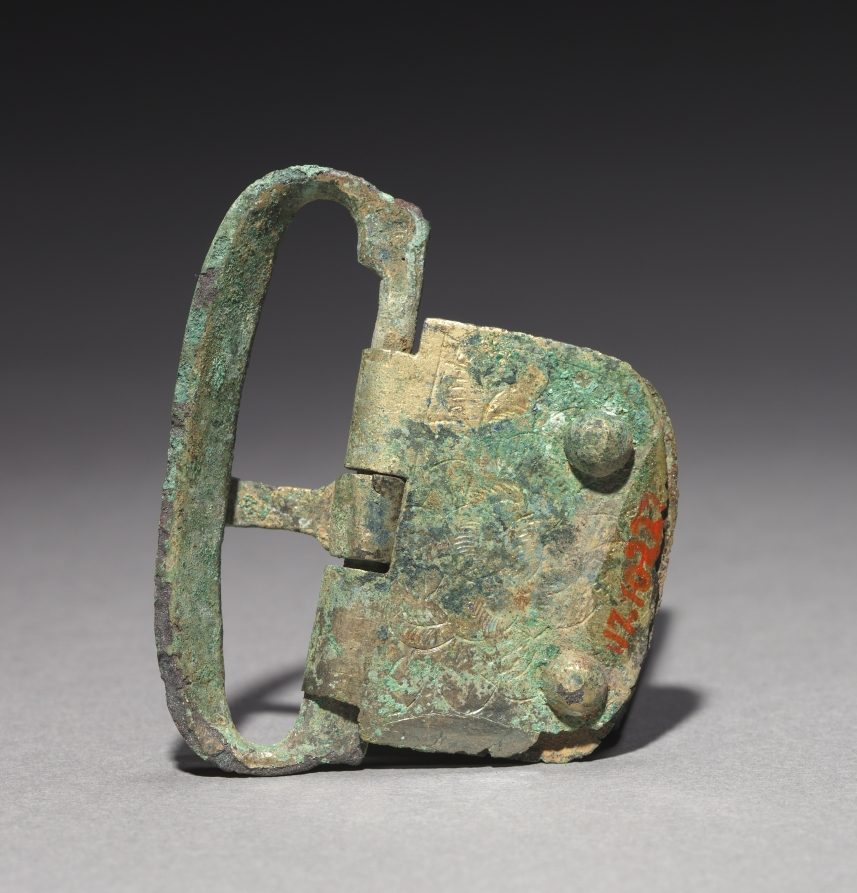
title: Belt Buckle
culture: Korea, Goryeo dynasty (918–1392)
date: 1100s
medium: bronze gilt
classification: Metalwork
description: Metallurgy advanced remarkably in the Goryeo period (918–1392), explaining why a large quantity of sophisticated metal artifacts with delicate designs were used not only as daily accessories but also as burial goods. Belt buckles like this one were attached to leather belts.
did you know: The Japanese antique dealer Yamanaka & Company, which opened its branches in New York (1895) and Boston (1899), sold small Korean archaeological materials such as this belt buckle to American collectors in the early 20th century.